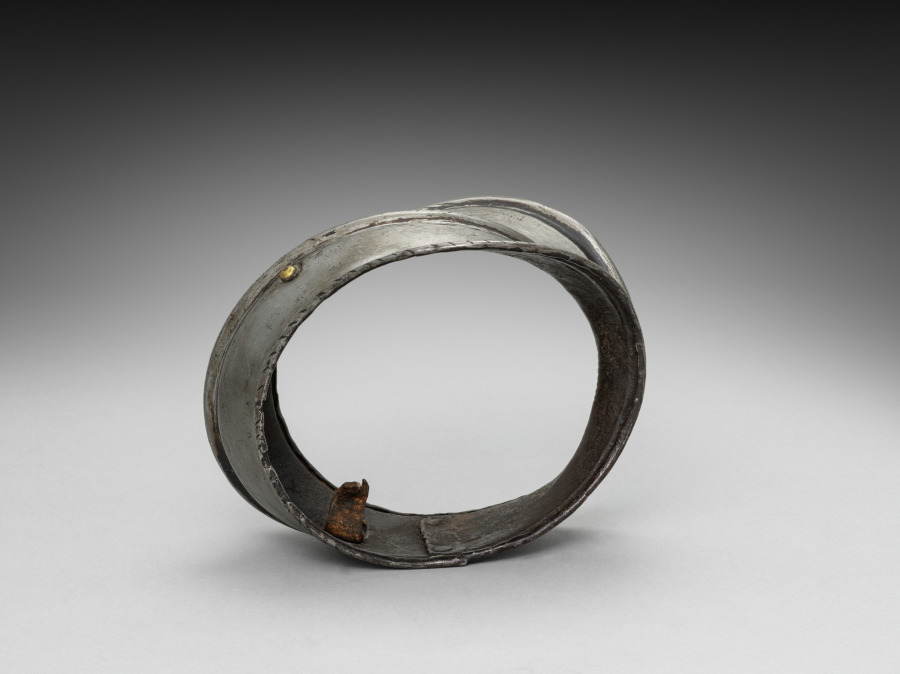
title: Knee Cap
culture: Germany, 19th century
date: 1801–1900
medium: steel with black paint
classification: Arms and Armor